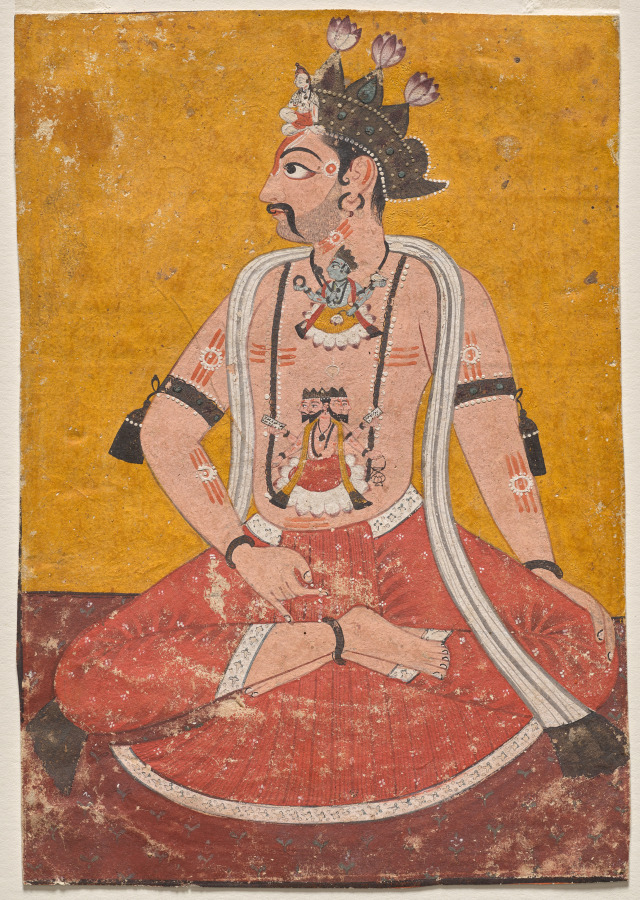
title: Man Dhata in Yogi Position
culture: India, Pahari, Nurpur, late 17th Century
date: c. 1690–1700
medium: Gum tempera and ink on paper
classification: Painting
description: An unconventional ruler portrait depicts Raja Mandhata of Nurpur (reigned 1661/1667–1700) engaged in yogic practice, raising his breath to pierce the three knots (ghranti) of the subtle body. The knots, which are located at the base of the spine, the heart, and between the eyebrows, are identified, respectively, with the deities Brahma, Vishnu, and Rudra (Shiva). This rare image of the ghranti points to the key role that kings played in creating yoga’s visual culture.